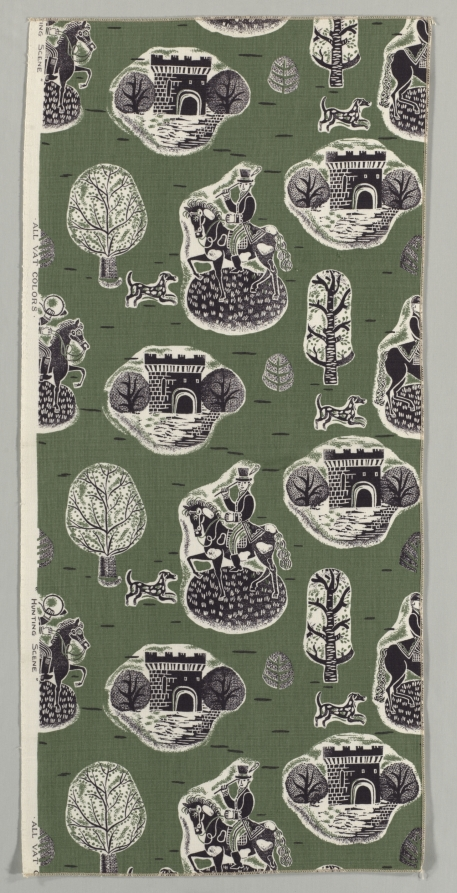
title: Textile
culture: England, 20th century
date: 1900s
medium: cotton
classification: Textile